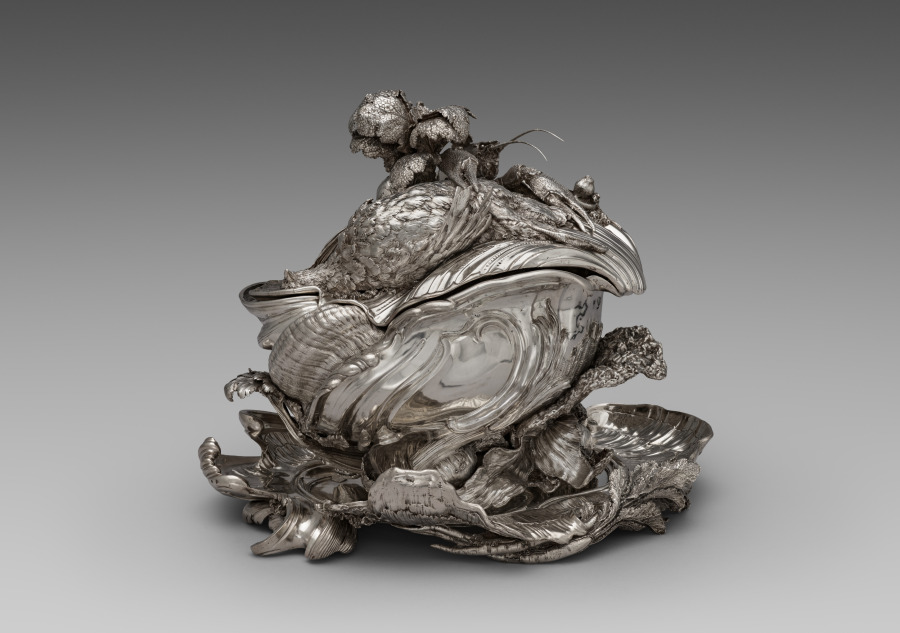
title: Covered Tureen on Stand (Pot-à-oille)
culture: France, Paris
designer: Juste-Aurèle Meissonnier (French, 1695–1750)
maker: Pierre-François Bonnestrenne (French)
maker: Henry Adnet (French, 1745)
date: 1735–38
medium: silver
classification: Silver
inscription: [Maker’s mark of Pierre−François Bonnestrenne, beneath platter; inside tureen (two marks)]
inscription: [Warden's mark for Paris, 1734−1735, beneath platter; inside tureen; inside cover]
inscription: [Charge mark of Hubert Louvet, Paris, 1732-1738, on platter border; beneath platter; beneath tureen; inside cover; inside tureen (two marks)]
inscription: [Discharge mark of Louis Robin mostly used for stamping small work, Paris 1738−1744, on platter border; beneath tureen]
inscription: [Warden's mark for Paris, 1736−1737, on platter border]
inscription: [Possibly British import mark, London, 1925, on platter border]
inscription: [Possibly mark of the British firm Charles & Richard Comyns, on platter border]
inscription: [Discharge of Louis Robin mostly used for stamping gold and silver between 1738 and 1744, beneath tureen; outside cover]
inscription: [Maker’s mark of Henry-Guillaume Adnet, inside cover]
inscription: [Two small undefined marks, inside cover]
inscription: [Under the surface of the platter the engraved signature]: “FAIT-PAR-I-A-MEISSONIER-ARCHITECTTE”; [and the weight] “673=5"; “No. [v] I 50 £ b76Sol”; [and the numbers] “A nº 1”; “A nº2”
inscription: [On tureen lip]: "MEISSONIER"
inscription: [On tureen lip]: “A nº 3”; “A nº2” [in order to place the tureen correctly on the stand]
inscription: [Numbers engraved on the stand, the tureen, and the cover to show how the piece should be assembled]: “A nº 1” [on the base of the tureen; beneath the cover; on the platter], “A nº 2” [on the platter], “A nº 3” [on the exterior rim of the tureen], “A nº4”; “A nº 5” [outside the cover], “A nº 7” [on the border of the platter]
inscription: [Two warden's marks for Paris, 1735-1736, beneath tureen]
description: This tureen exemplifies the French Rococo style, an artistic movement celebrating naturalistic forms that developed in Paris during the early 1700s. In contrast to classical, controlled symmetry, Rococo forms morph, twist, and spill into the space around them. Meissonnier embellished this tureen in a picturesque arrangement of vegetables and creatures, transforming a utilitarian object into a decadent display of wealth and abundance. This masterpiece comes from a set of two tureens commissioned by the English Duke of Kingston during an extended stay in Paris in the 1730s.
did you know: The langoustine, pigeon, and vegetables were cast using real examples giving the silver copies lifelike detail and appearance.